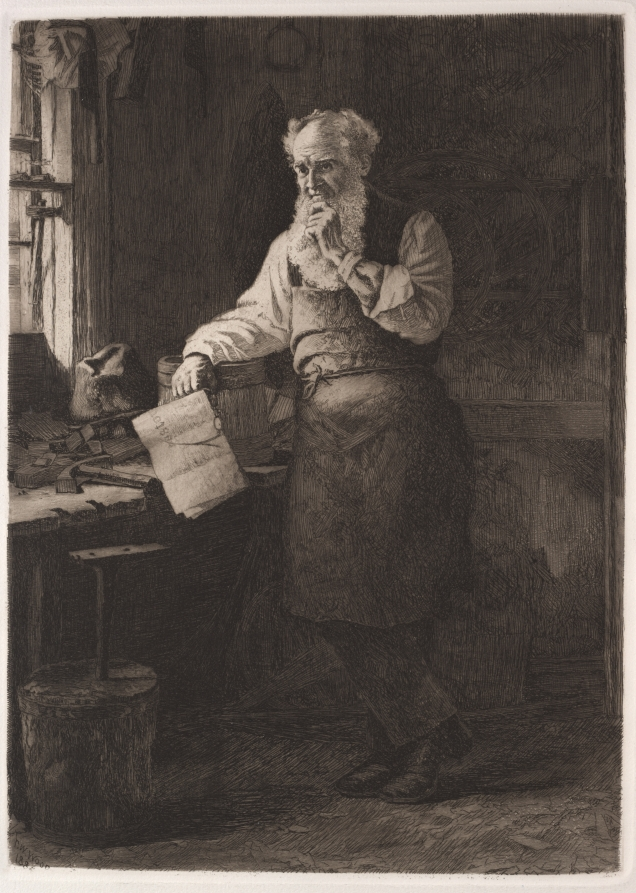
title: Thinking It Over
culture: America, Ohio, Cleveland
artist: Thomas Waterman Wood (American, 1823–1903)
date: 1884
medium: etching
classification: Print